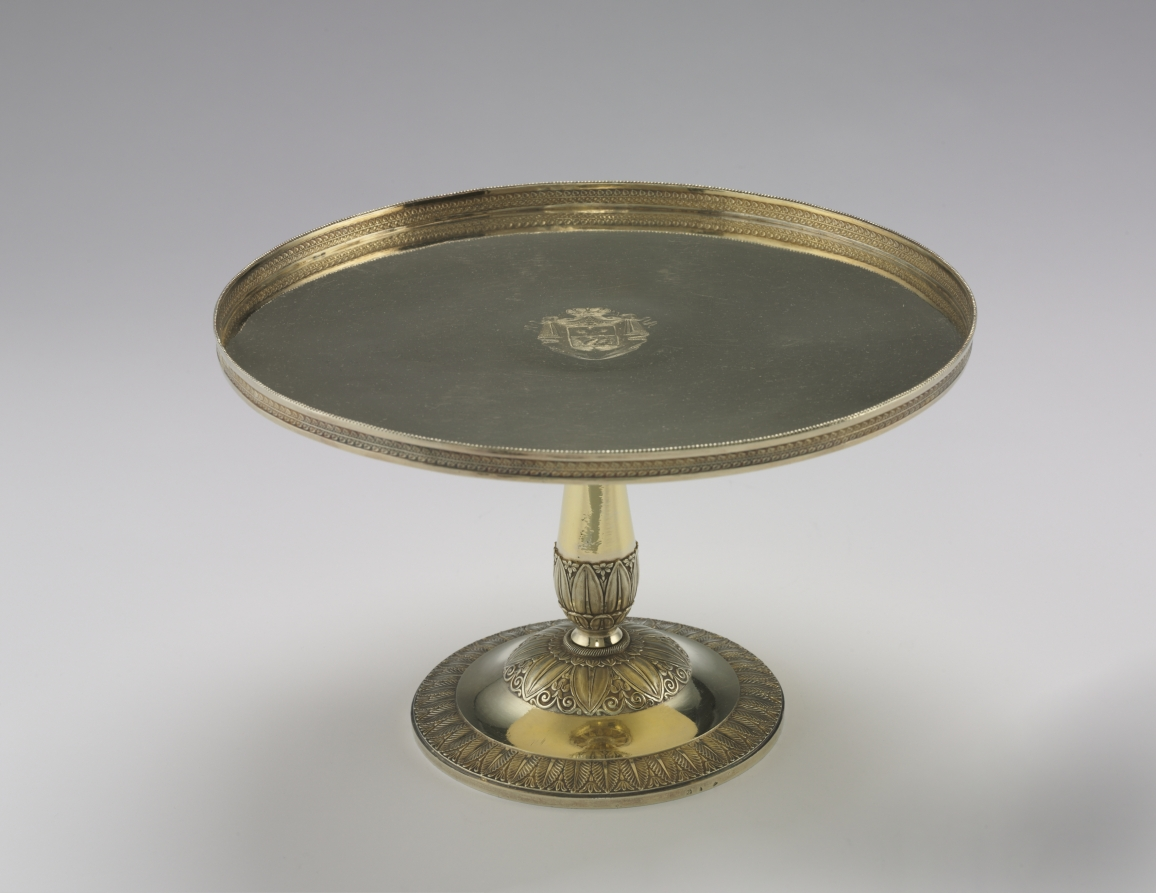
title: Tazza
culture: Italy, Rome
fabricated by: Pietro Paolo Spagna (Italian, 1793–1861)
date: c. 1815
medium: silver gilt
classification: Silver